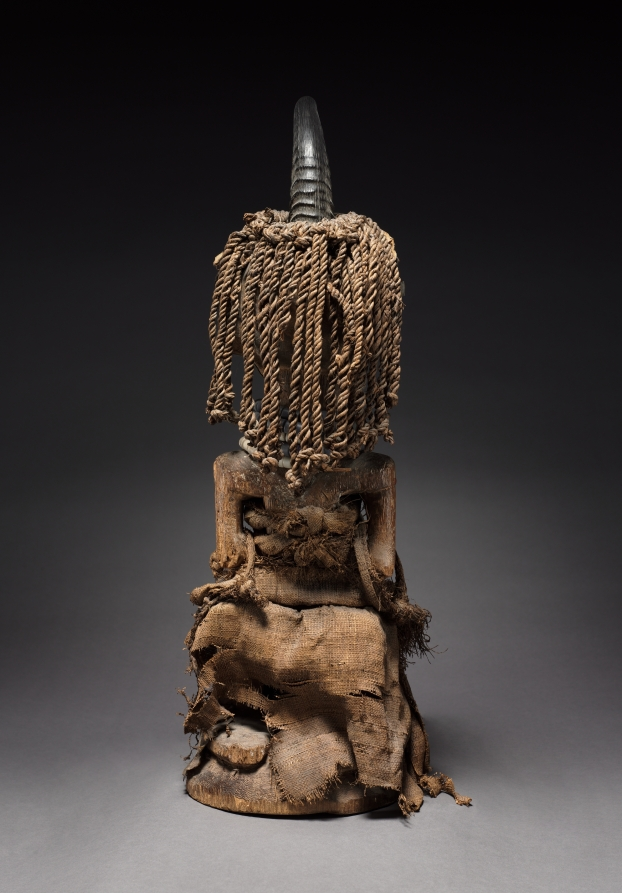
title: Male Figure (nkishi)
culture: Africa, Central Africa, Democratic Republic of Congo, Songye-style carver and nganga (priest)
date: late 1800s–early 1900s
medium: Wood, glass beads, brass (including upholstery studs), copper alloy, iron alloy, raffia, reedbuck antelope horn, rawhide, animal hair, human teeth, organic material, minerals, and plant fibers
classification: Sculpture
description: This figure's visual impact and workmanship suggest that an extended family––rather than an individual––used it. The raffia skirt around the waist and the blue and white beads are indicators of leadership. The metal appliqué covering the face and the metal blades that hedge the headgear refer to the blacksmith, a culture hero celebrated in a Songye myth narrating the formation of the state. The metal strips on the skeletal face are said to relate to lightning, signaling the figure's role as a powerful anti-sorcerer, but the contrast between white iron and red copper symbolically alludes to the ambivalent powers of the figure.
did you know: Researchers conducted X-ray scanning on this figure, revealing its internal structure and human teeth, an antelope horn, and animal hair.